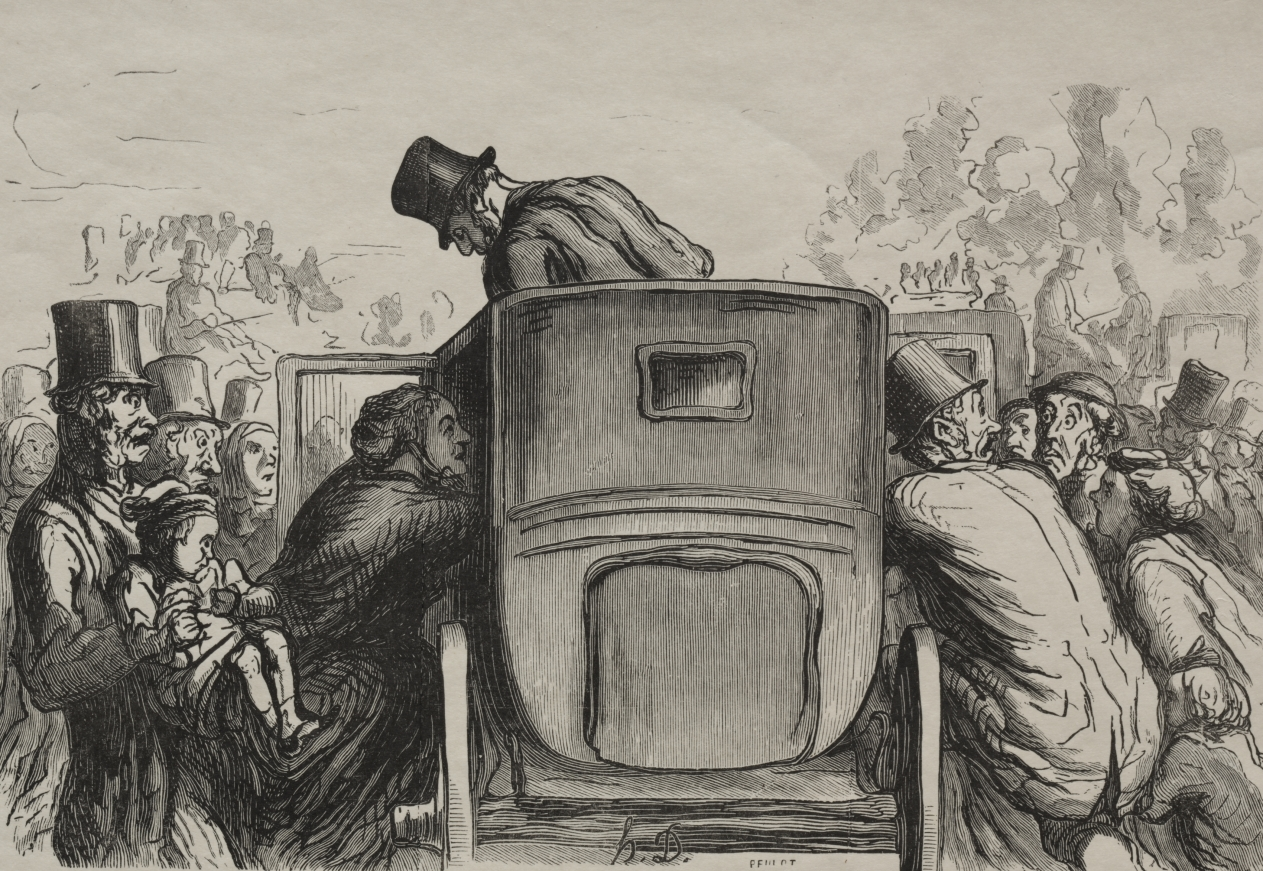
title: At the Universal Exhibition: The visitor will find all means of transportation desirable to return to his hotel.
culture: France, 19th century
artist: Honoré Daumier (French, 1808–1879)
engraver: Julien Antoine Peulot (French, 1827–1927)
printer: François Louis Schmied (Swiss, 1873–1941)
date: 1867, printed 1920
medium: wood engraving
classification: Print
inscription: Lower margin, in pencil: 65/75 ; red stamp: FLS